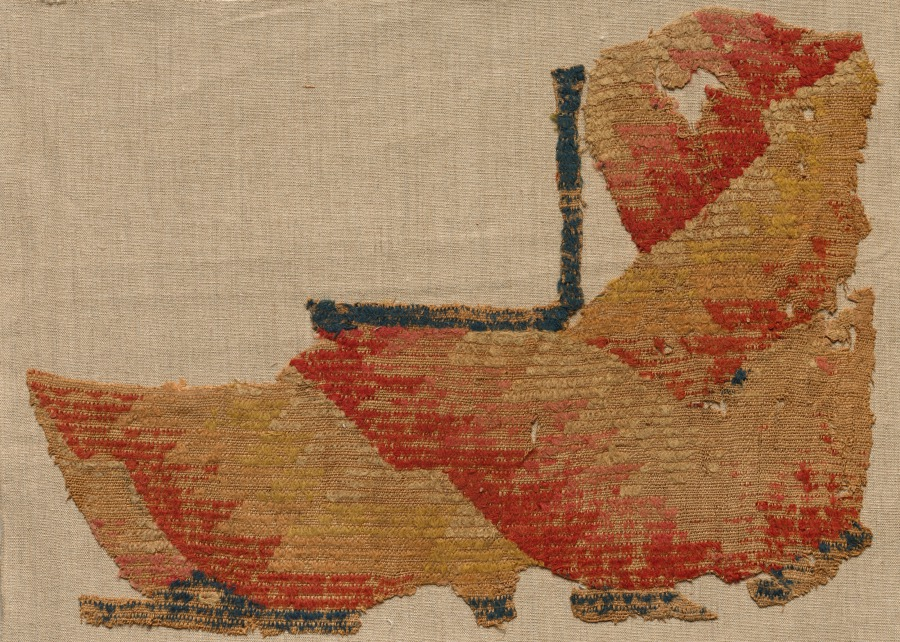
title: Fragment, Probably an Ornament from a Large Curtain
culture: Egypt, Byzantine period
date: late 400s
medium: looped-weft weave; linen and wool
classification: Textile